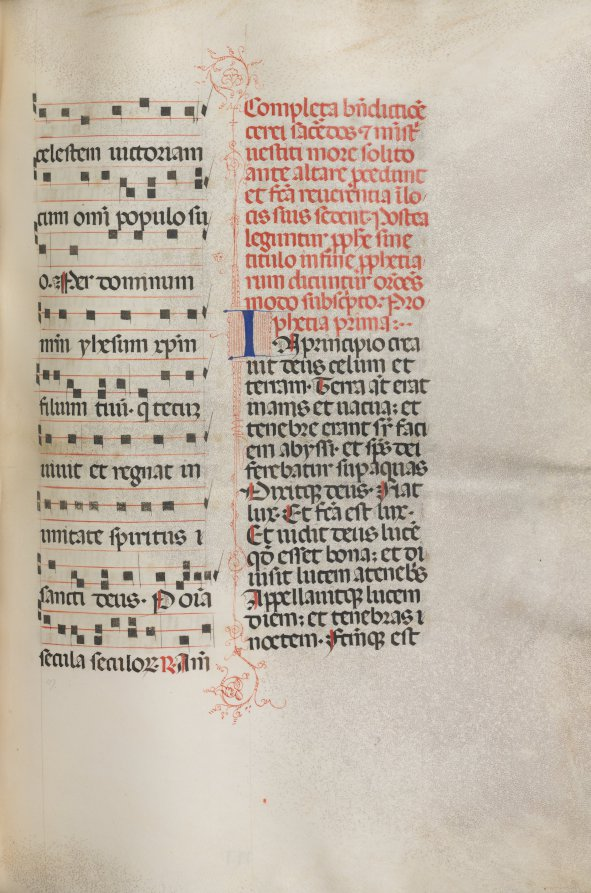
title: Missale: Fol. 158: Music for "Exultet"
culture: Italy, Perugia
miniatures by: Bartolommeo Caporali (Italian, c. 1420–1503)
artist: assisted by Giapeco Caporali (Italian, d. 1478)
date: 1469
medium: ink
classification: Bound Volume